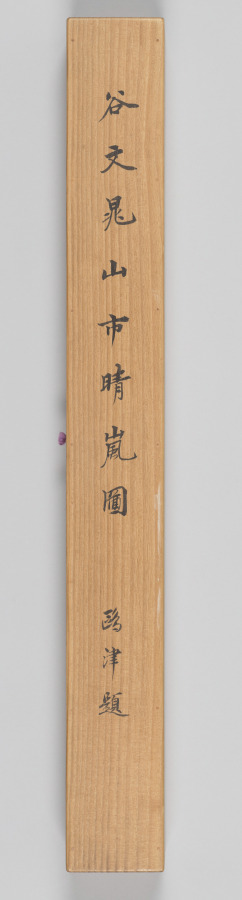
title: Mountain Market in Clearing Mist, from Eight Views of Xiao-Xiang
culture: Japan, Edo period (1615–1868)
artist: Tani Bunchō (Japanese, 1763–1841)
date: 1788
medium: album leaf remounted as a hanging scroll; ink and color on paper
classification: Painting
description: This painting was part of a set of album leaves representing the Eight Views of Xiao-Xiang, a theme originating in Chinese poetry and painting that spread to both Korea and Japan. Southern China’s Xiao-Xiang area, where the mist-covered banks of the Xiang River created a complex landscape shifting like the moods and minds of people, captured the imaginations of generations of painters and calligraphers. Inscriptions on these works suggest that they were possibly ordered by newly prominent Japanese Confucian scholars.